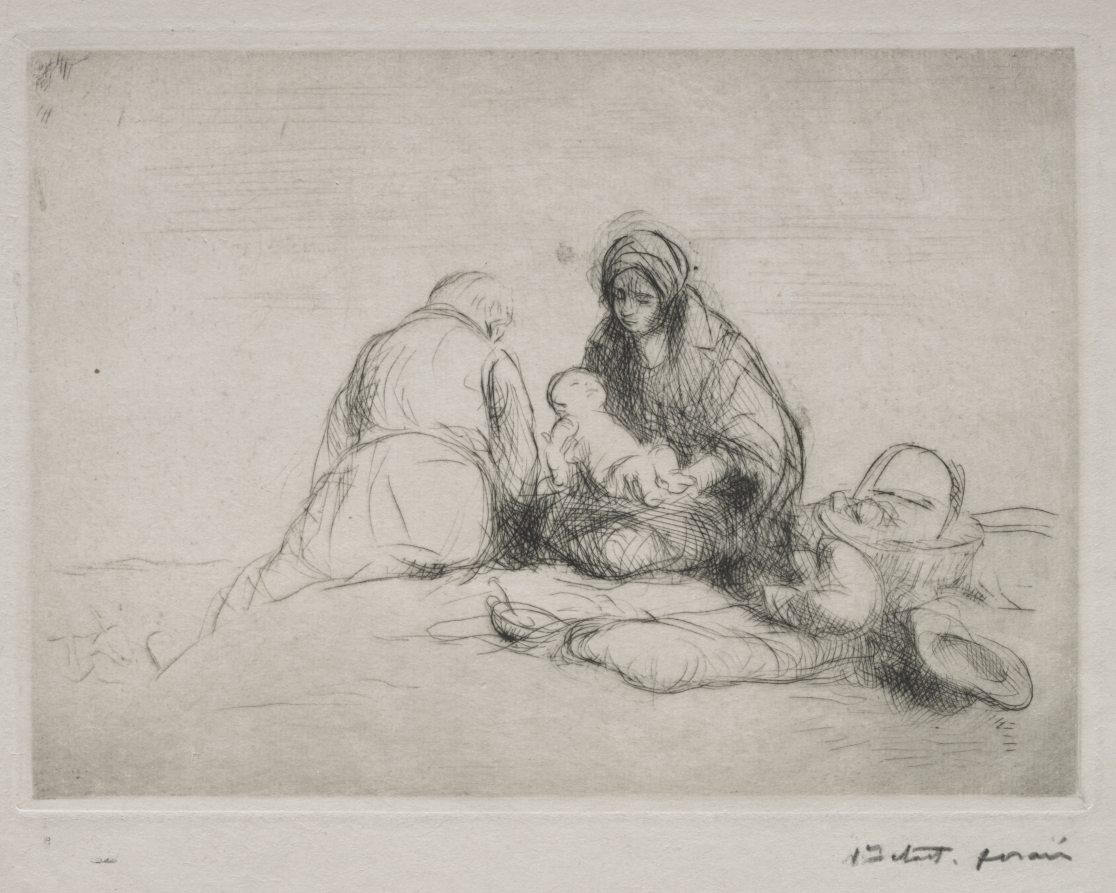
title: Rest on the Flight into Egypt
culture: France, 19th-20th century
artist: Jean Louis Forain (French, 1852–1931)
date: 1909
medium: drypoint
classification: Print